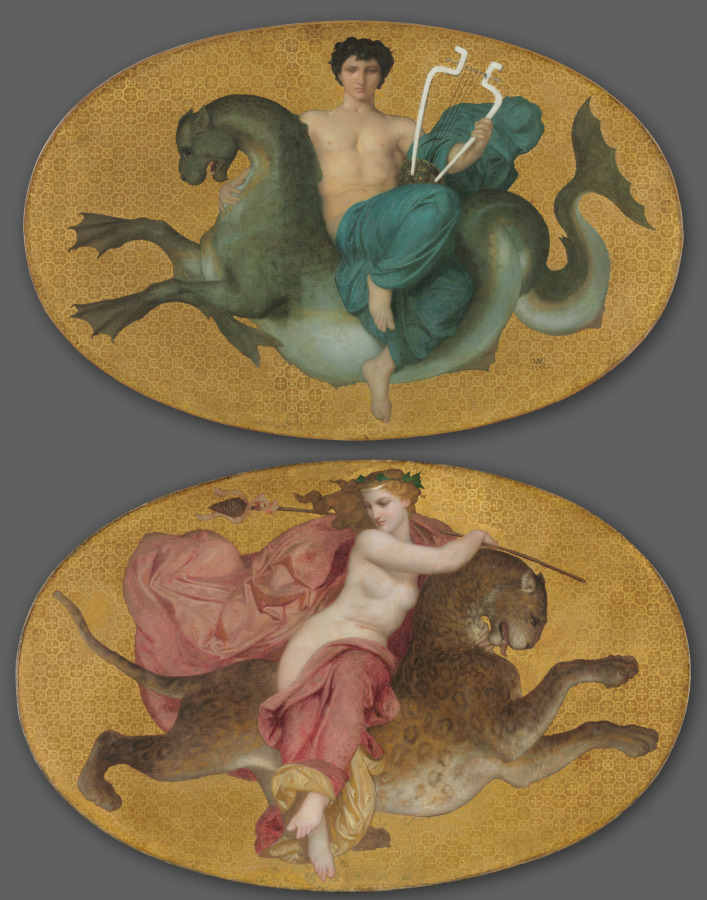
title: Arion on a Sea Horse and Bacchante on a Panther (pair)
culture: France, 19th century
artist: William Adolphe Bouguereau (French, 1825–1905)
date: 1855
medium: oil on fabric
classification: Painting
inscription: Signed lower right: wb [in monogram] / 1855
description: These paintings are from a series of eight works that Bouguereau painted for a Parisian home decorated in the style inspired by ancient Roman wall paintings found at Pompeii. The ancient Greek poet Arion escaped pirates by fleeing on the back of a sea creature attracted by the poet's singing. In the companion picture, a bacchante, a female follower of the Roman god Bacchus, rides a panther and carries a pinecone-tipped spear called a thyrsus. The figures are silhouetted against a gold honeycomb–patterned background evoking ancient Roman mosaics Bouguereau had studied in Italy. The soft, waxy flesh tones and glimmering gold leaf were calculated to come to life when viewed under the mansion's gas lighting.